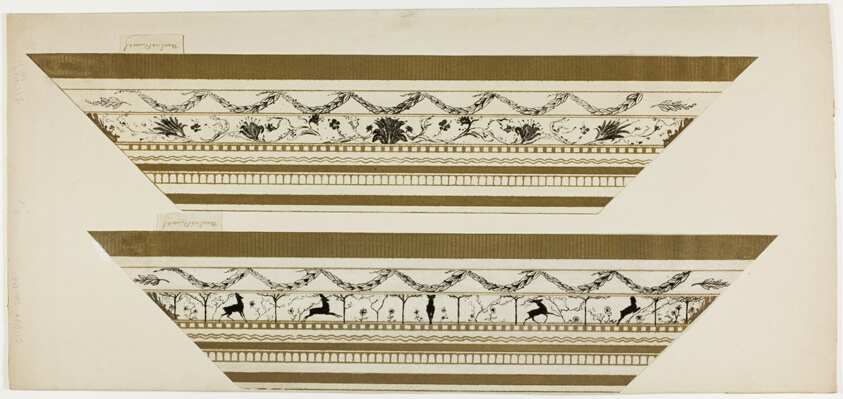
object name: Print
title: Stag and Flower Pattern Frame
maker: Theodore Roussel (French, worked in England, 1847-1926)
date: 1897–99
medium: Etching and soft ground in black, brown and yellow metallic on ivory laid paper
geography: England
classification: etching; paper; print; prints and drawing